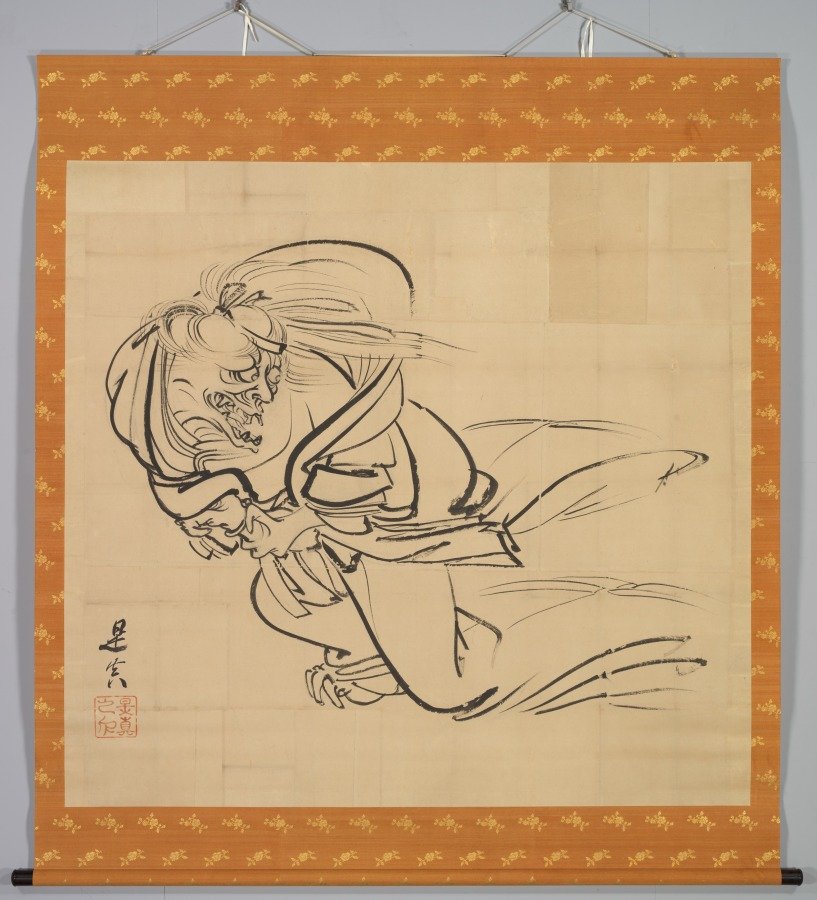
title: Sketch of Ibaraki-dōji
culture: Japan, Edo period (1615–1868)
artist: Shibata Zeshin (Japanese, 1807–1891)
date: c. 1840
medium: hanging scroll, ink on paper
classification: Painting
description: Even before the arrival of US ships demanding trade, Japan’s military government was experiencing economic challenges. This preparatory drawing is for a wooden plaque to be offered to a shrine, beseeching divine intervention in business affairs. Commissioned by a wholesalers’ union, it shows the demon Ibaraki-dōji reclaiming his arm from a warrior who, according to legend, had cut it off. The repossession of the arm is a metaphor for the union’s desire for the restoration of rights to sell sugar, which had been rescinded by the government as part of a misguided effort to stabilize the economy.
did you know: The demon Ibaraki, having disguised itself as the aunt of warrior Minamoto no Yorimitsu to gain access to its severed limb, is shown is in the midst of transforming back into demon form.